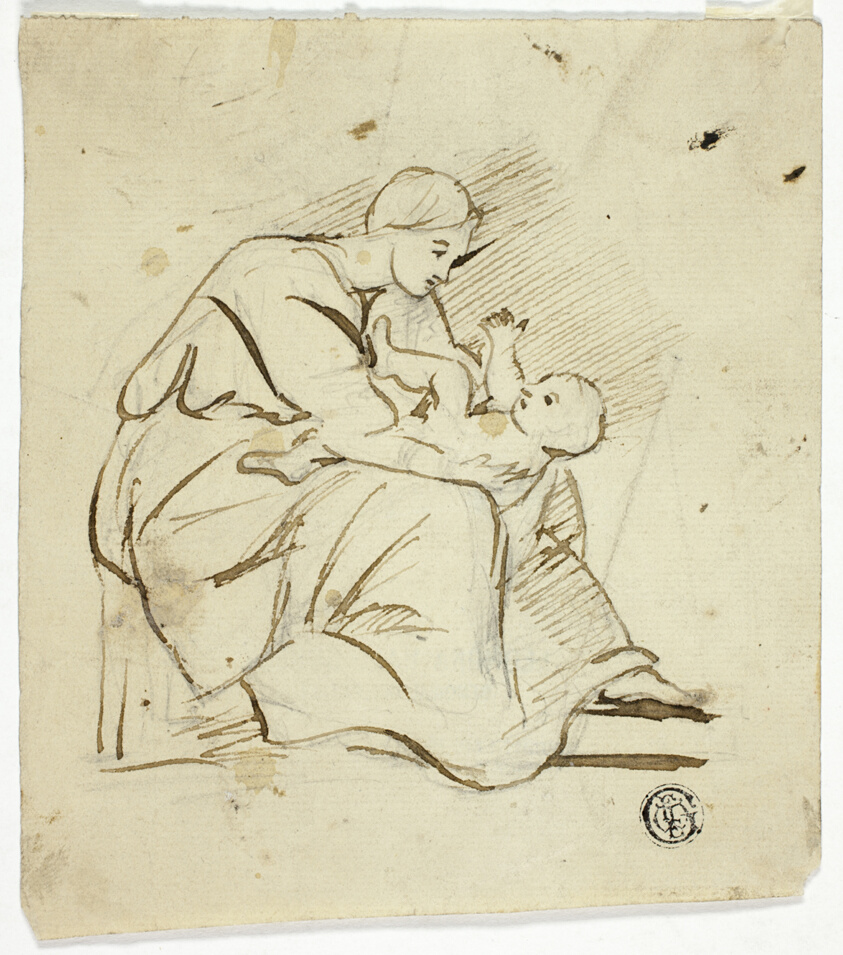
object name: Drawing and Watercolor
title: Seated Woman Playing with Child in Her Lap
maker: Follower of George Romney (English, 1734-1802); after Nicolas Poussin (French, 1594-1665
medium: Pen and brown ink, over traces of graphite, on cream laid paper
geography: France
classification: pen and ink drawings; drawings (visual works); prints and drawing